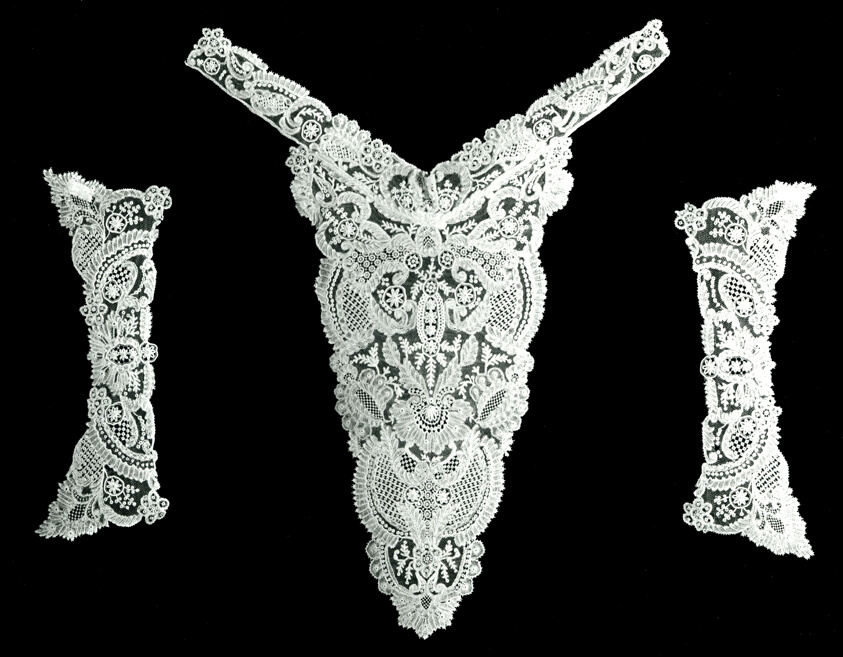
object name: Textile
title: Dress Front and Pair of Cuffs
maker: Belgium, Brussels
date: Late 1890s/1900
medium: Cotton and linen, mixed lace of needle lace and bobbin part lace of a type known as "Duchesse"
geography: Brussels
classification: textile; lace - mixed